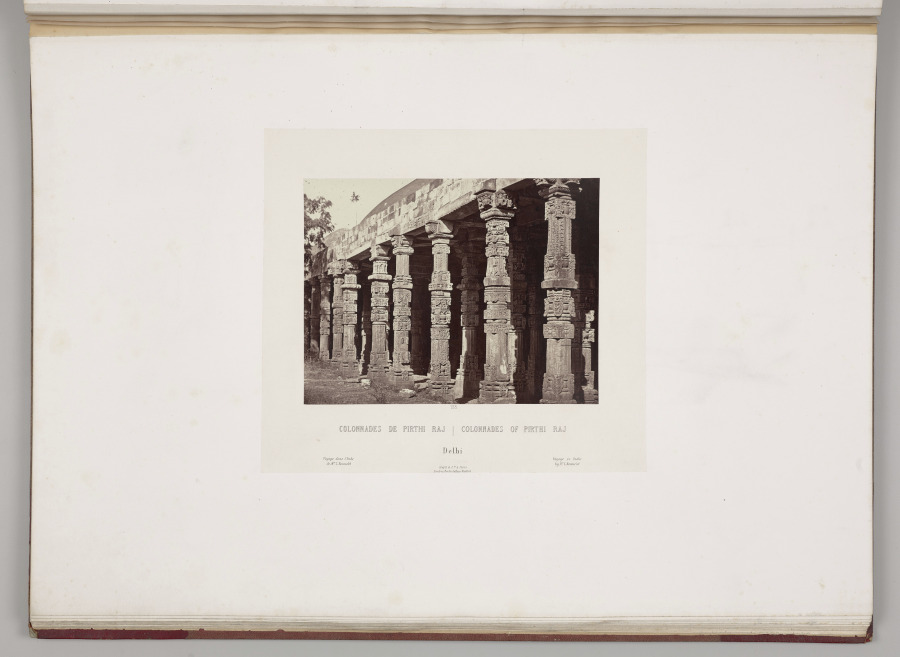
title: Colonnades of Pirthi Raj, Delhi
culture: France, 19th century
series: India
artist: Louis-Théophile Marie Rousselet (French, 1845–1929)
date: 1865–68, published 1869–70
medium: Albumen print from glass plate negative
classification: Photograph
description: Concerned that his drawings did not do justice to the splendor of India’s monuments, Rousselet learned photography in India that year, a remarkable accomplishment. He proved to be a talented photographer with a sophisticated sense of composition. The scenes in this volume sweep across sites of Sultanate, Rajput, and Mughal power in northern India, from the sacred Hindu city of Varanasi on the Ganges River to Alwar in Rajasthan. Also included are several scenes of industry and portraits of Indian rulers.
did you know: Louis Rousselet described himself as a “scientific traveler” when he went to India alone at age 18 in 1863 and stayed into 1868.